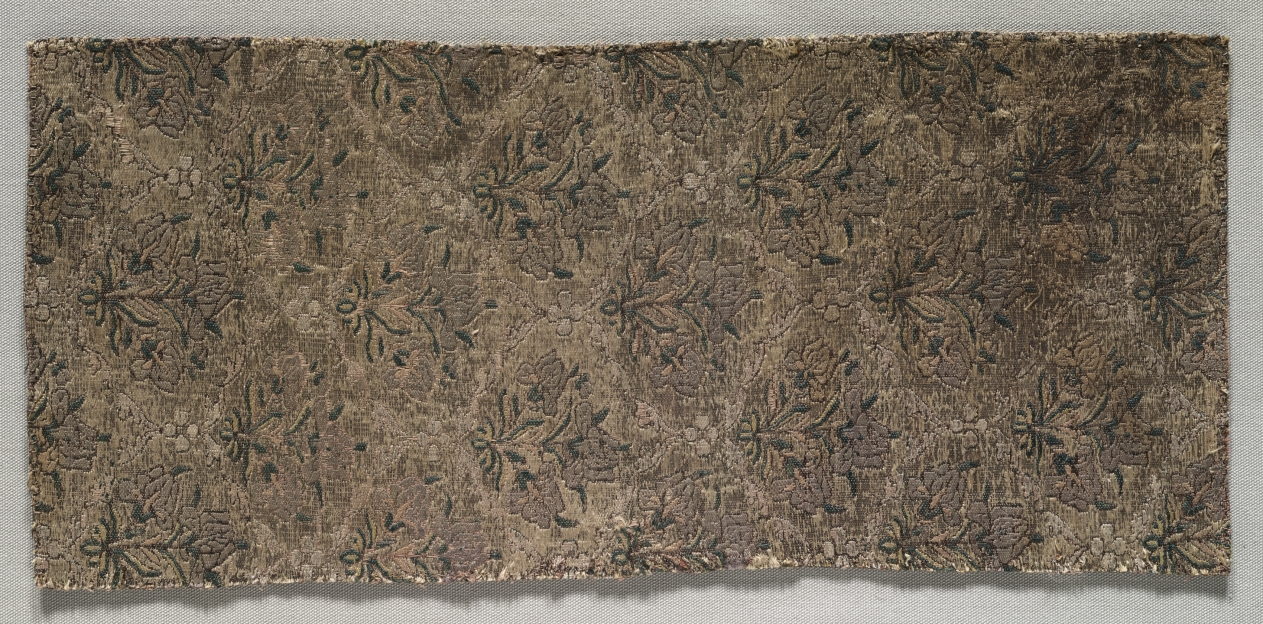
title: Fragment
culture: Iran, 17th-18th century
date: 1600s - 1700s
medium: brocade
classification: Textile